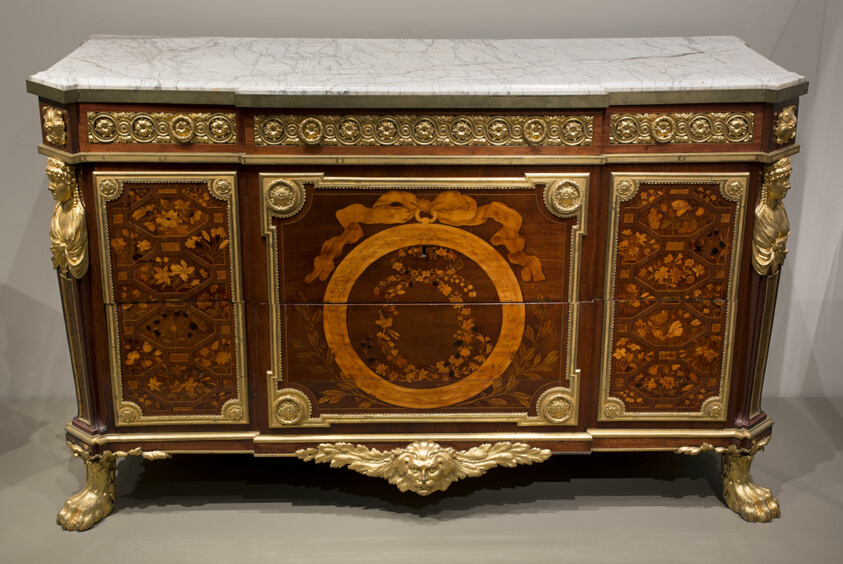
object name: Furniture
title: Commode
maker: Jean Henri Riesener; French, born Germany, 1734–1806; Paris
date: 1770–80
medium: Oak, mahogany, kingwood, purple heart, and unidentified exotic woods, gilt bronze, and marble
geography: France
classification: case furniture; furniture; european decorative arts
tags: furniture